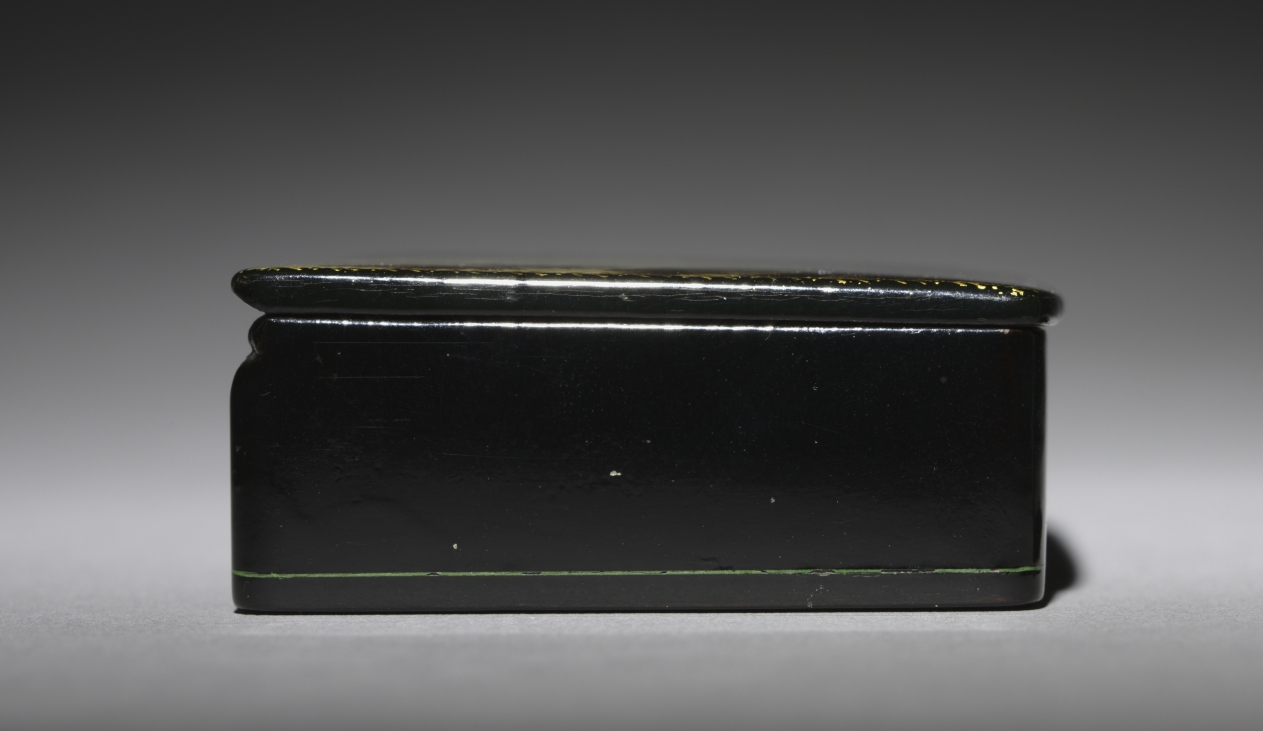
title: Snuff Box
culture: Russia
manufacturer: Lukutin Factory (Russian, 1818–1904)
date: 1800s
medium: wood with black lacquer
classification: Miscellaneous